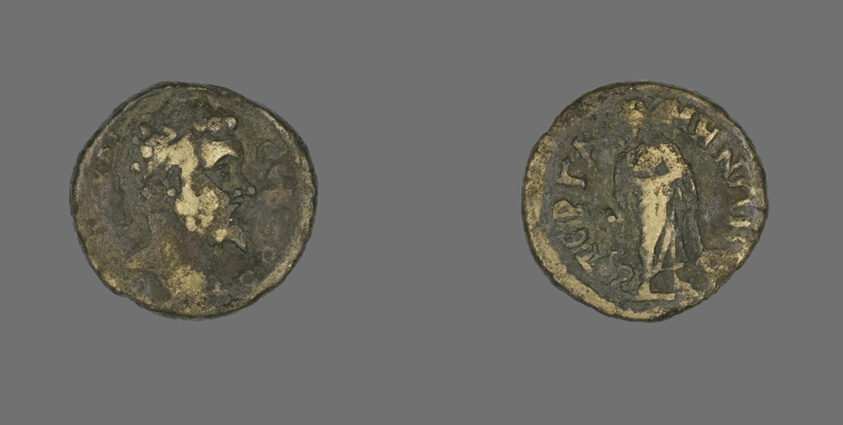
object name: Coin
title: Coin Portraying Emperor Septimius Severus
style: roman (ancient, style or period), ancient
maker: Roman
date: 159-138 BCE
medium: Bronze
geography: Rome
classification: coin; ancient art